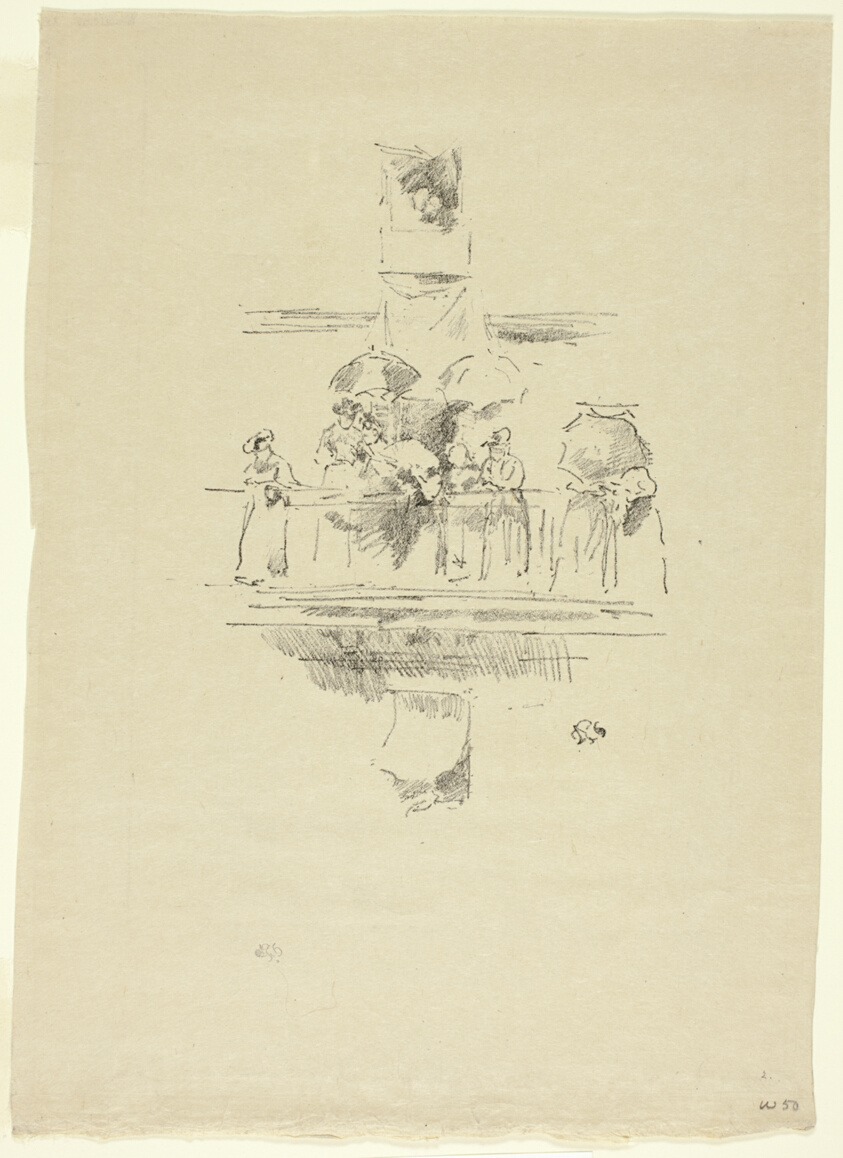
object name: Print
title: The Little Balcony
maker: James McNeill Whistler (American, 1834-1903)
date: 1894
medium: Transfer lithograph in black on cream laid Japanese vellum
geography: United States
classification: transfer lithograph; lithograph; print; prints and drawing